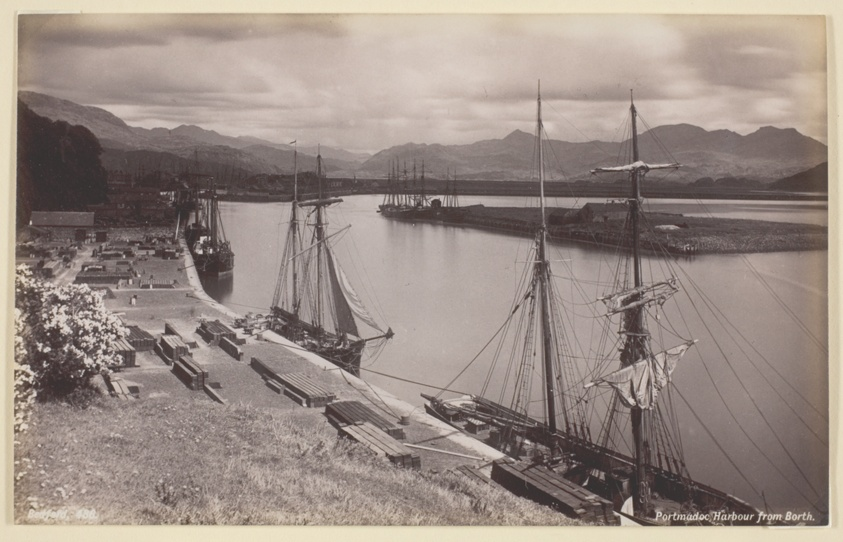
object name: Photograph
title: Portmadoc Harbour from Borth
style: 19th century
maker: Francis Bedford (English, 1816–1894)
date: 1860/94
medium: Albumen print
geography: England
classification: albumen silver print; photographic process; photography; photograph